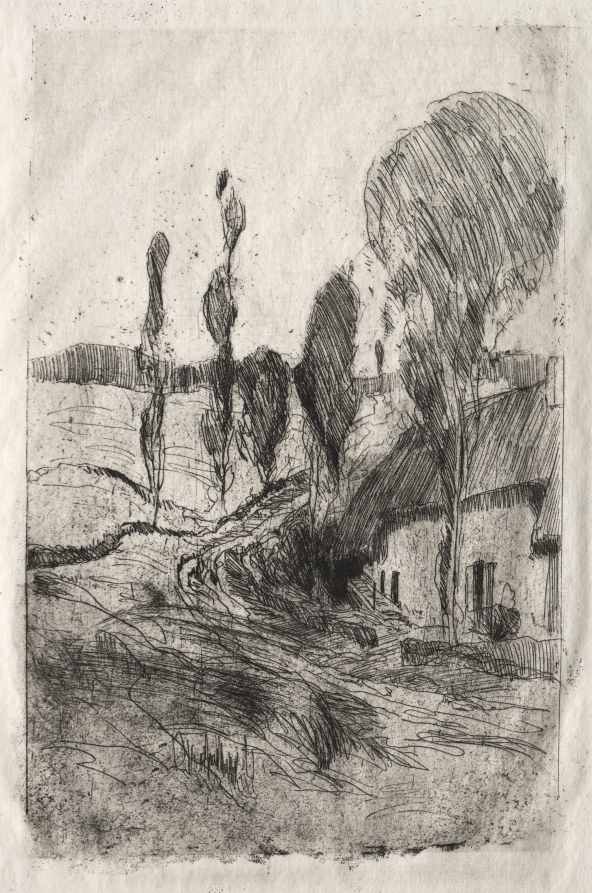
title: French Landscape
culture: America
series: 7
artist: John Henry Twachtman (American, 1853–1902)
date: ca. 1884–89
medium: etching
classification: Print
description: The extremely free handling of this composition, reminiscent of prints by Pissarro or Corot (both also in this exhibition), suggests that Twachtman made the etching from nature.